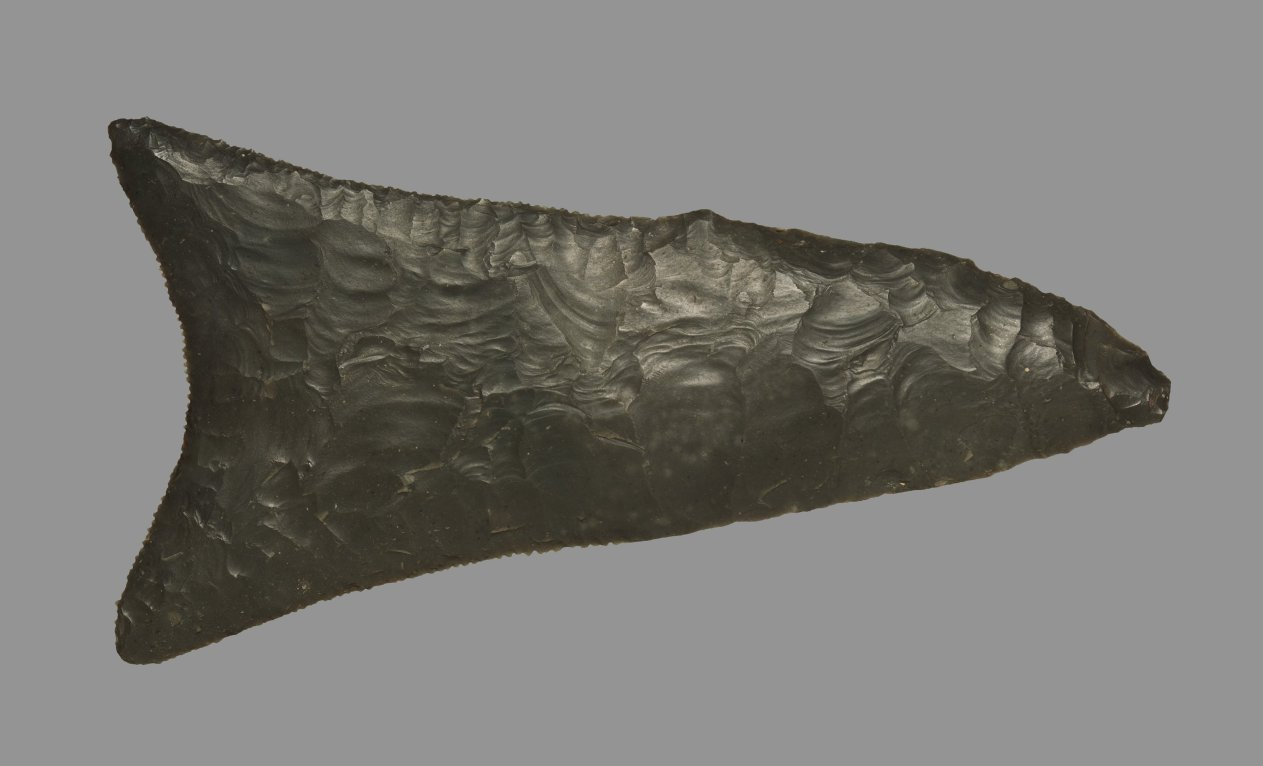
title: Fishtail Knife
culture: Egypt, Predynastic (5000–2950 BCE), Naqada Ia–IIa (3900–3300 BCE)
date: 4500–4000 BCE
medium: dark brown to a dark green colored flint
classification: Implements